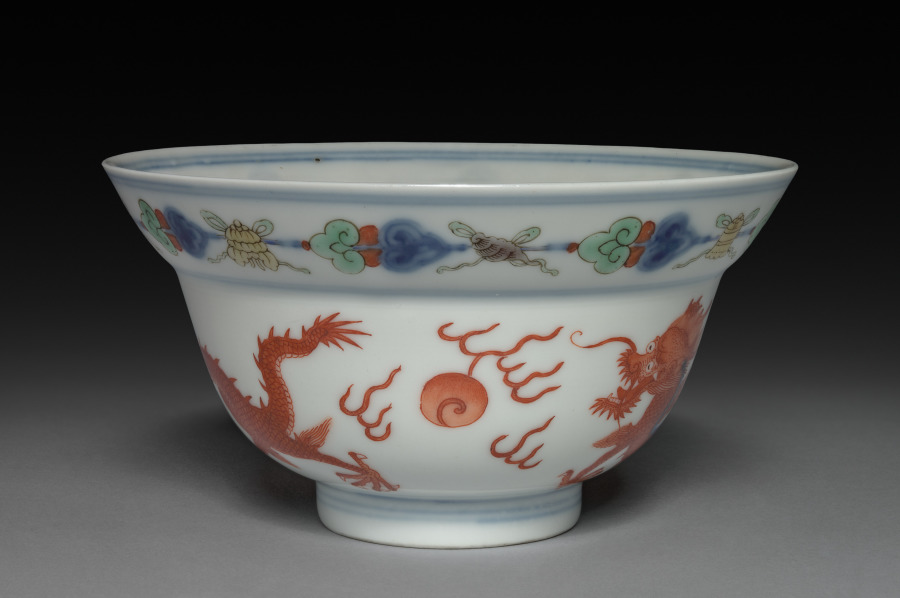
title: Bowl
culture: China, Jiangxi province, Jingdezhen kilns, Qing dynasty (1644-1911), Yongzheng mark and reign (1722-35)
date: 1723–35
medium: porcelain with doucai decoration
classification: Ceramic